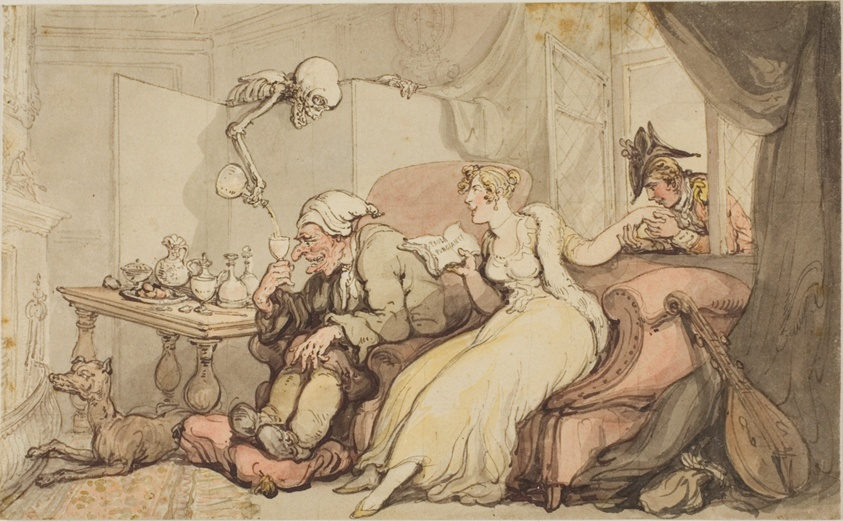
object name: Drawing and Watercolor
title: Study for The Honeymoon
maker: Thomas Rowlandson (English, 1756-1827)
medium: Brush with brown ink and watercolor, over graphite, on cream wove paper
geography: England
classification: watercolor; drawings (visual works); prints and drawing